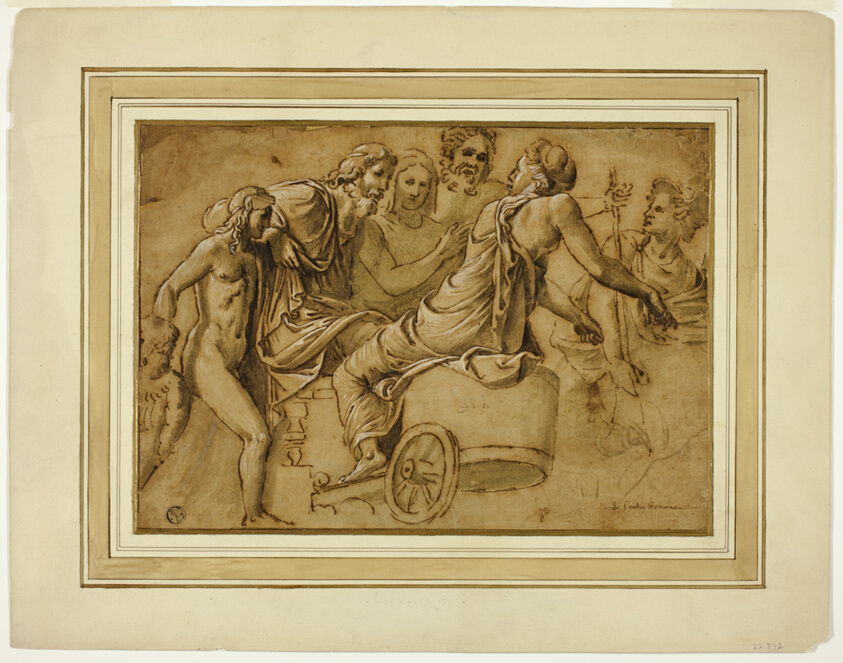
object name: Drawing and Watercolor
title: Study for Venus Asking Jupiter for the Services of Mercury as Herald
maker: After Giulio Pippi, called Giulio Romano; Italian, c. 1499-1546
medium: Pen and iron gall ink, with brush and green-gray wash, heightened with white gouache, on laid paper prepared with brown wash, laid down on ivory laid card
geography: Italy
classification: drawings (visual works); prints and drawing